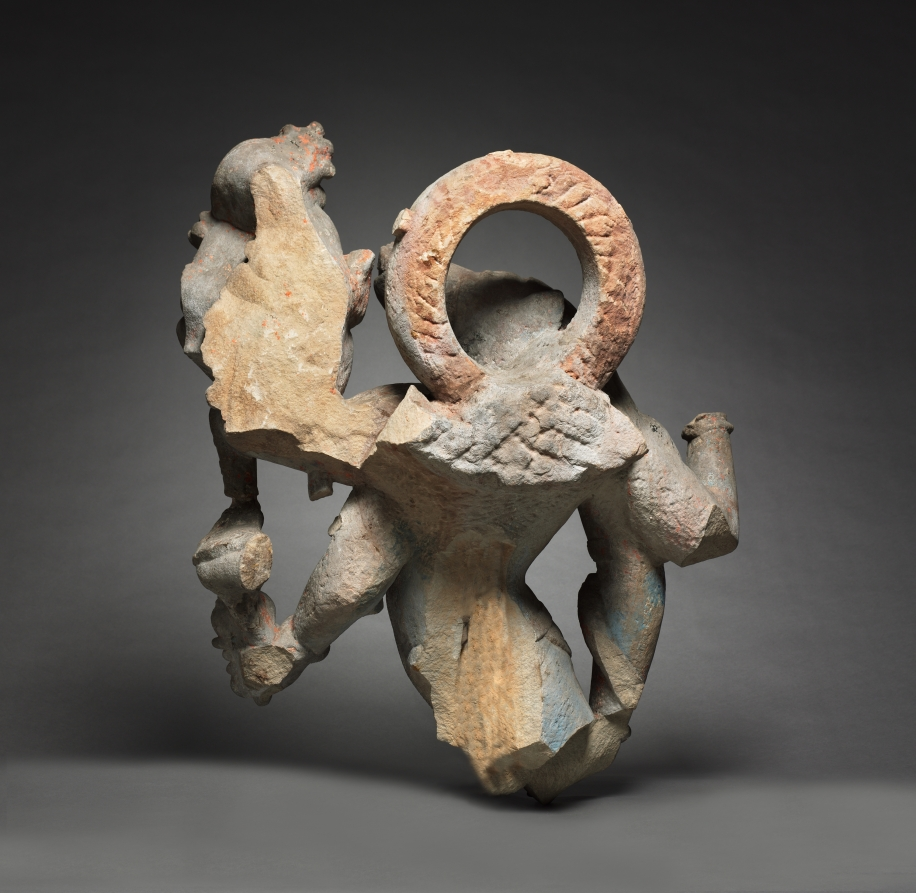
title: Varaha, Boar Incarnation of Vishnu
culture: Central India, probably Madhya Pradesh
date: 700–800s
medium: sandstone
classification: Stone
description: The Hindu god Vishnu took the form of a boar to rescue his wife Bhu (Earth in Sanskrit) from the bottom of the primordial ocean, where she had been hidden by a demon. Here shown with the head of a boar and the powerful lunging body of a warrior, Varaha holds out one of his four elbows as a seat for the earth goddess who he has rescued.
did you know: In his two left hands, he hold the conch and discus.